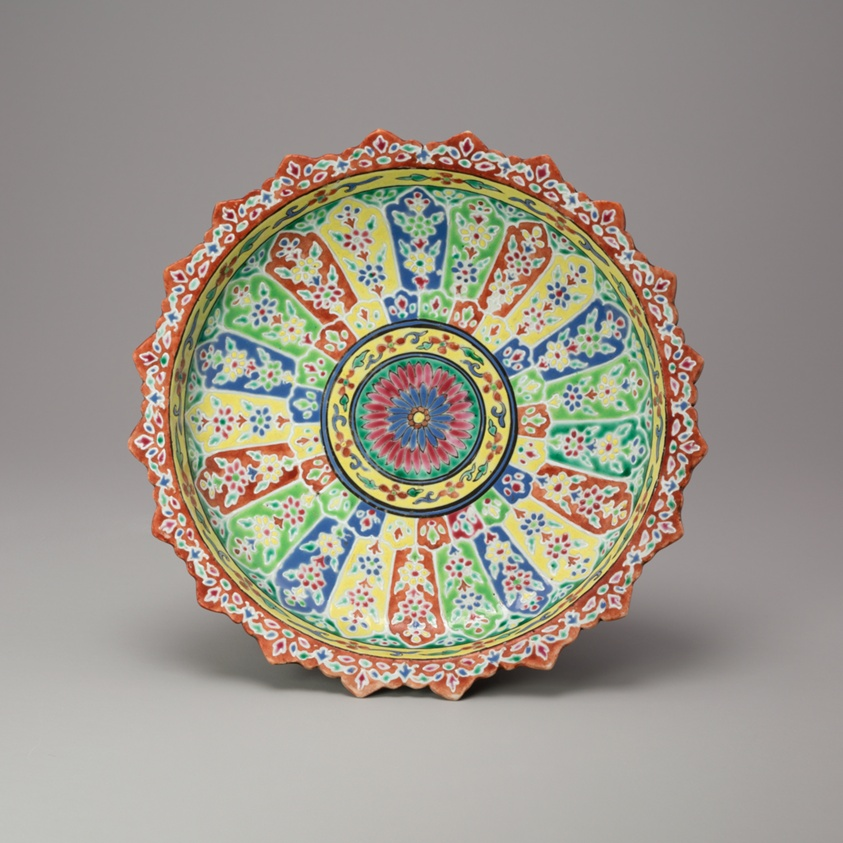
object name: Decorative Arts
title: Bencharong (Five-Colored) Ware, Footed Stem Plate with Foliate Rim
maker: China, for the Thai Market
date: 19th century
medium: Porcelain painted in overglaze polychrome enamels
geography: China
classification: porcelain; asian art; ceramics; decorative arts